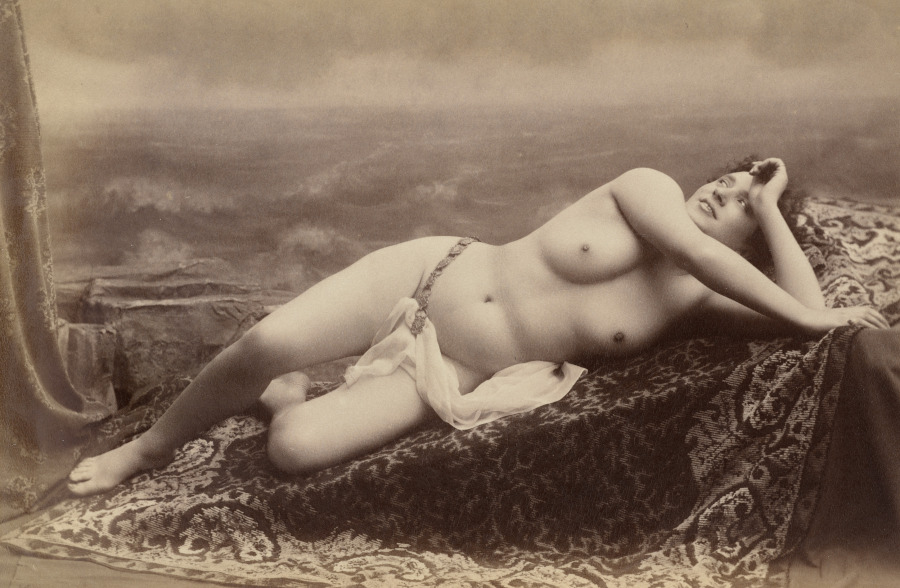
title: Untitled (reclining nude on carpet against painted backdrop of waves)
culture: Unknown, 19th century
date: 1870s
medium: albumen print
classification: Photograph